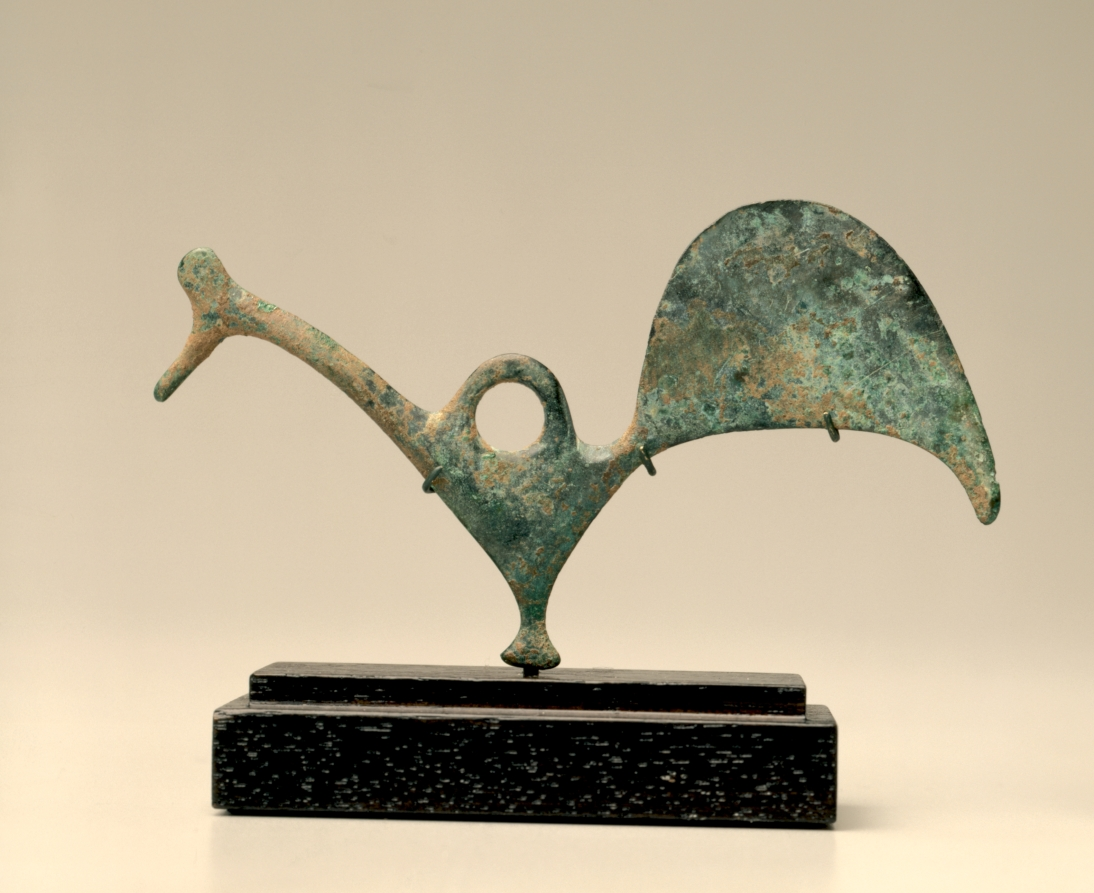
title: Pendant of a Bird (Rooster?)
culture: Northern Greece, Macedonian, Geometric period (900-700 BCE)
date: 700s–600s BCE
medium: bronze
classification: Jewelry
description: Although quite schematic, the subject of this pendant is easily recognizable as a bird, likely a rooster. Cleverly designed to hang evenly from its central suspension loop, it comprises three main parts: long neck terminating in a head with a pointy beak and small crest; triangular body with stylized feet; and broadly arched tail feathers.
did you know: The green patina of this bronze bird pendant is a result of oxidation.